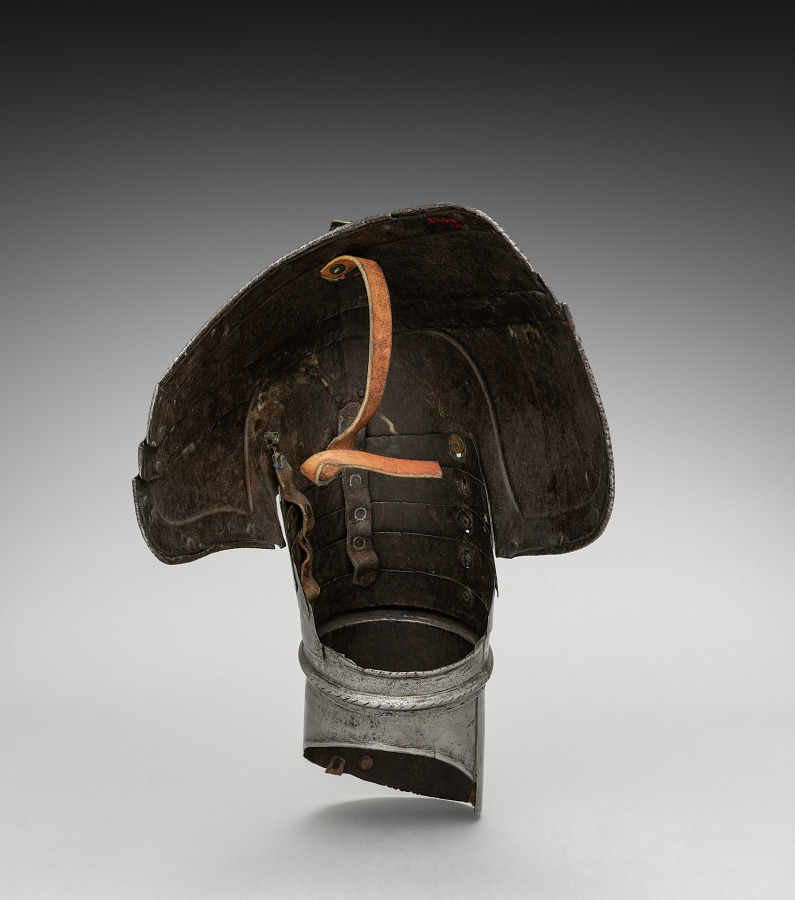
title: Right Pauldron with Rerebrace (upper cannnon)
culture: Germany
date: c.1550–1570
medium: iron, steel, leather and brass rivets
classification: Arms and Armor